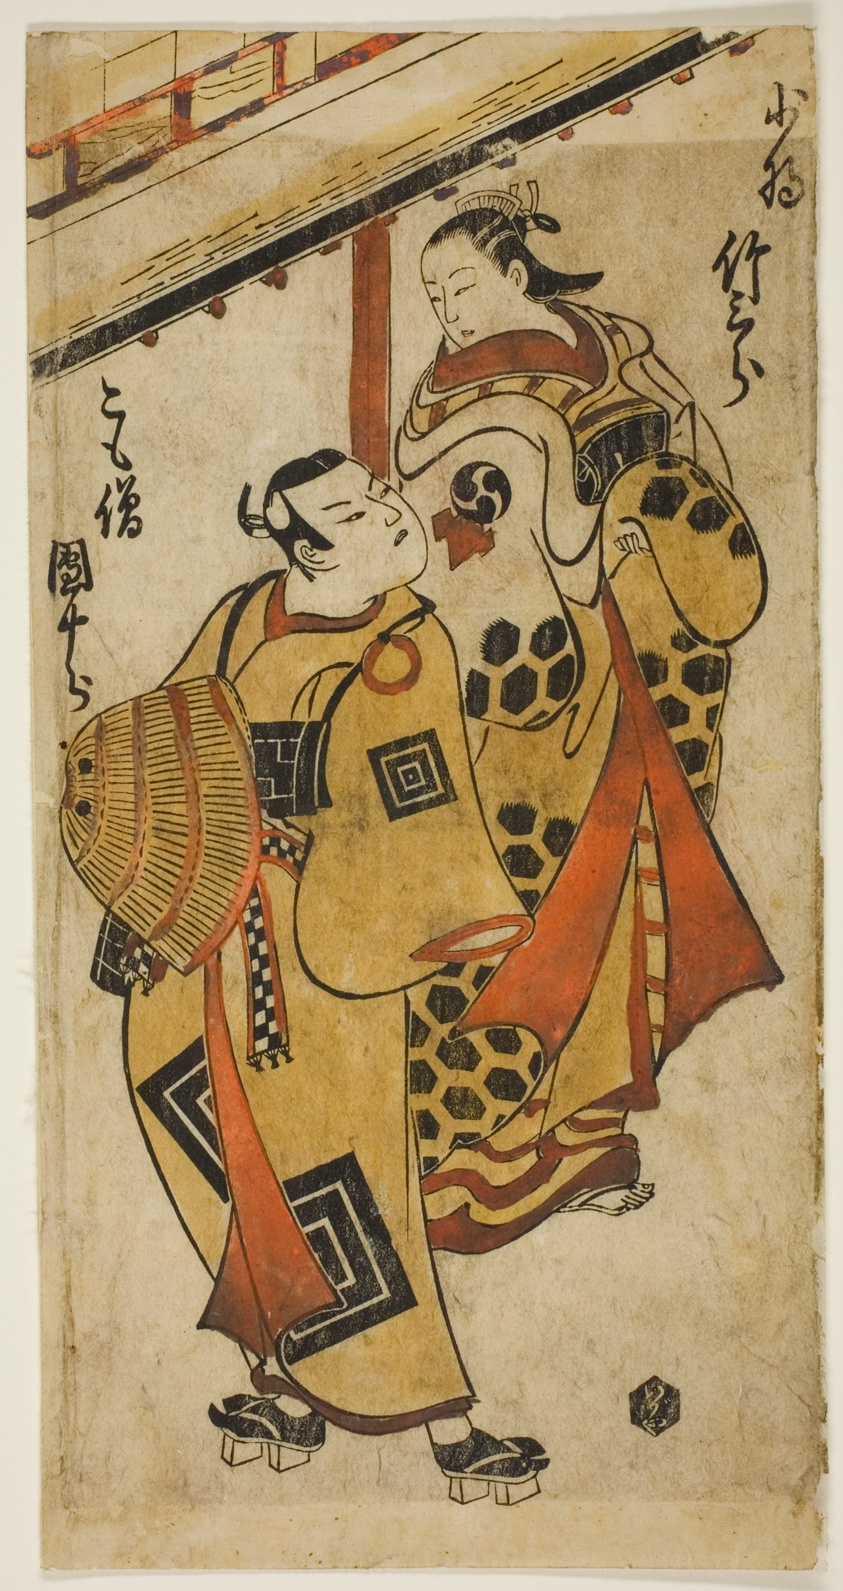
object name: Print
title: The Actor Ichikawa Danjuro II as Soga no Goro and Nakamura Takesaburo I as Kewaizaka no Shosho in the play "Bando Ichi Kotobuki Soga," performed at the Nakamura Theater in the first month, 1715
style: Japanese (culture or style)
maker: Attributed to Torii Kiyonobu I; Japanese, 1664-1729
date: 1715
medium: Hand-colored woodblock print; hosoban, tan-e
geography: Japan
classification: woodblock print; print; asian art